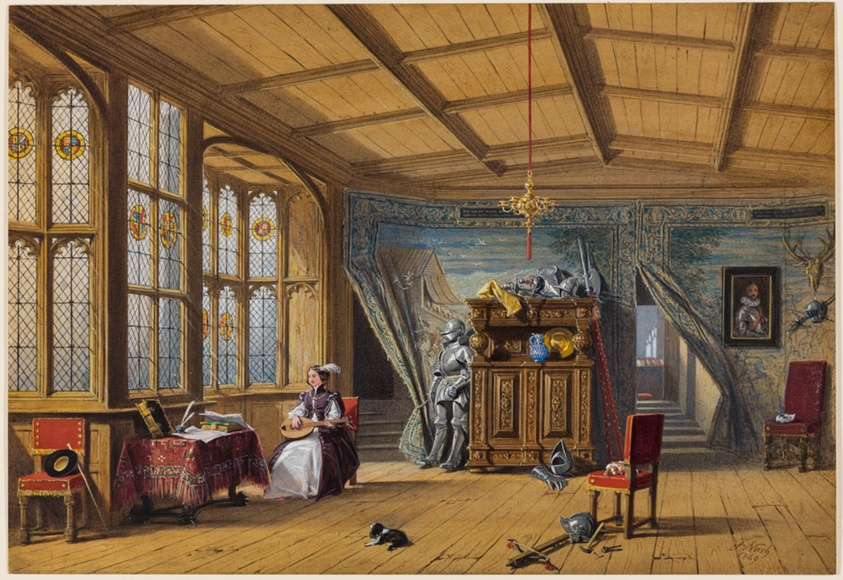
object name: Drawing and Watercolor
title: Room Leading to the Chapel, Knowle, Kent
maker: Joseph Nash (English, 1808-1878)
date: 1869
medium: Watercolor and gouache, with touches of brush and black ink, heightened with white gouache, over graphite on cream wove paper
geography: England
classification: watercolor; drawings (visual works); prints and drawing